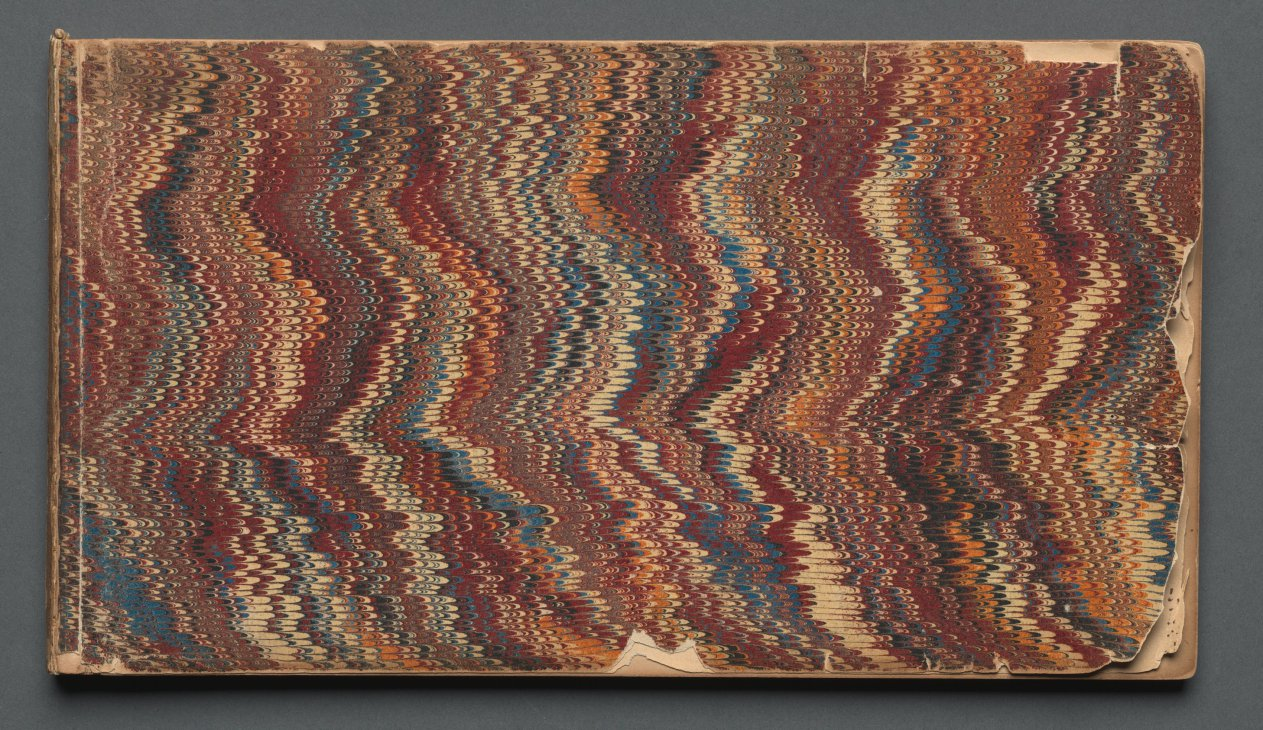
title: Sketchbook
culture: America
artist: Sanford Robinson Gifford (American, 1823–1880)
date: 1859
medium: graphite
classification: Bound Volume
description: Gifford was an American landscape painter belonging to the second generation of Hudson River school artists. Based in New York City with a studio at the Tenth Street Studio Building, Gifford took annual summer trips to the Catskills, the Adirondacks, and other scenic locations in New England. This sketchbook accompanied the artist on his expedition in 1859 to New Hampshire and Maine, where he drew sites such as Dixville Notch, the White Mountains, and Peaks Island, Casco Bay. Gifford used such graphite studies as the basis for oil paintings worked up in his studio, such as A Home in the Wilderness (1866).